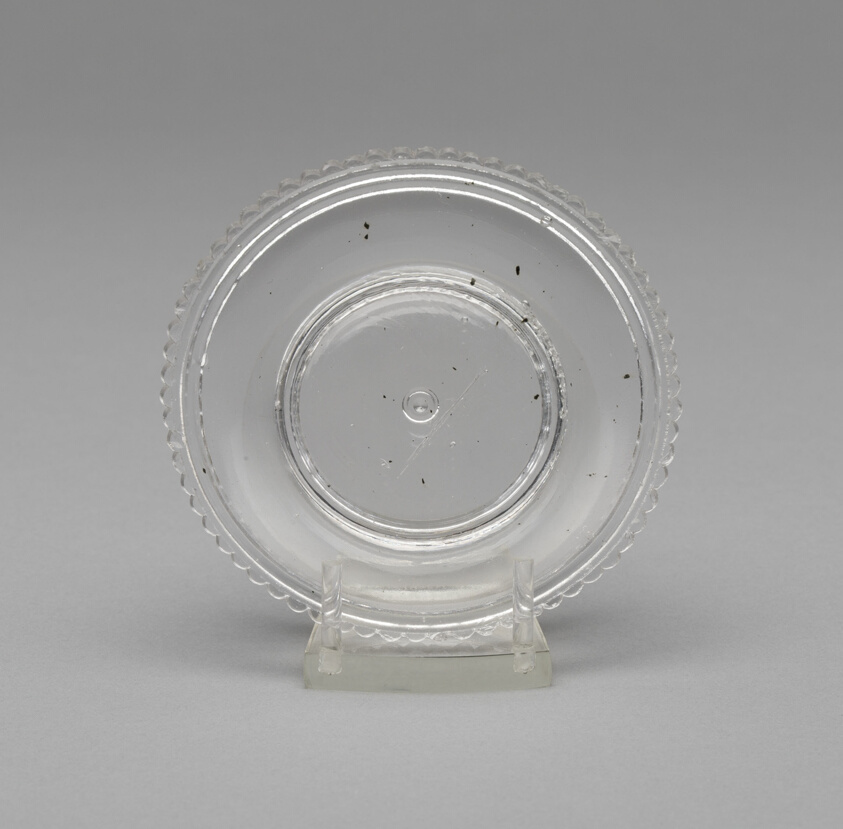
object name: Glass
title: Cup plate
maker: Artist unknown (American, 19th century)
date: 1830–35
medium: Pressed glass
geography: United States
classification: plate (general, dish); glass; american decorative arts; american arts; decorative arts